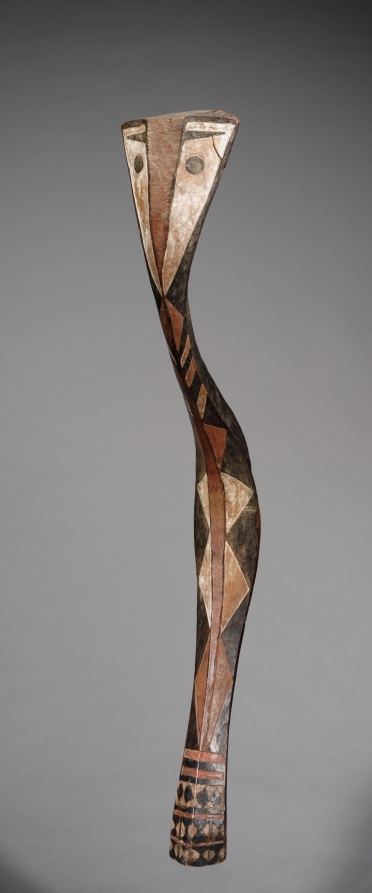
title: Serpent Headdress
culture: Africa, West Africa, Guinea, possibly Baga-style maker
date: late 1800s–early 1900s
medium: Wood (Nauclea pobeguinii) and paint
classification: Mask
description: Traditionally, Baga society was ruled by village councils of elders who derived their power from their direct contact with spirit entities through lifelong initiation rituals and the accumulation of secret knowledge. Two different religious orders controlled initiations, providing the context for much Baga art. One was identified as female, the other as male, though only men belonged to both groups. Initiations in each order followed three stages, culminating in the revelation of the highest spirit being. This type of Baga headdress embodied the serpent spirit Ninkinanka, honored for giving rain, bestowing riches, and bringing forth children. The serpent figure would be placed on top of a conical framework of palm branches carried on a male dancer’s head. It appeared at the end of the first level of the initiation for boys and girls or just before the circumcision at the beginning of the boys’ initiation.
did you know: In the context of boys' initiations, the serpent headdress was sometimes identified as the rainbow, which the Baga and their neighbors associate with beginnings and endings, life and death, and the continuation of lineages.